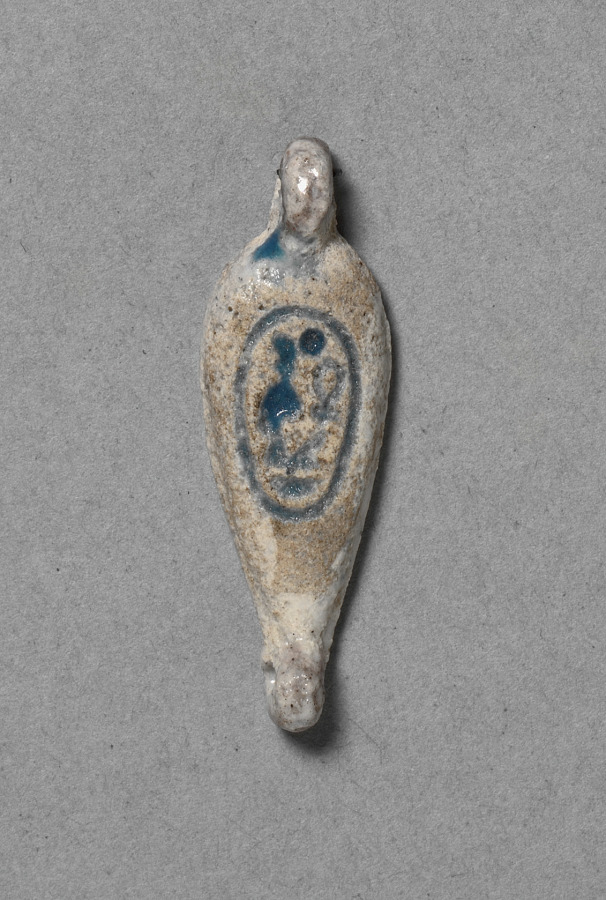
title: Petal-Shaped Bead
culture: Egypt, New Kingdom (1540–1069 BCE), Dynasty 18, reign of Amenhotep III (1390–1352 BCE)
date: c. 1391–1353 BCE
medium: faience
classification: Jewelry